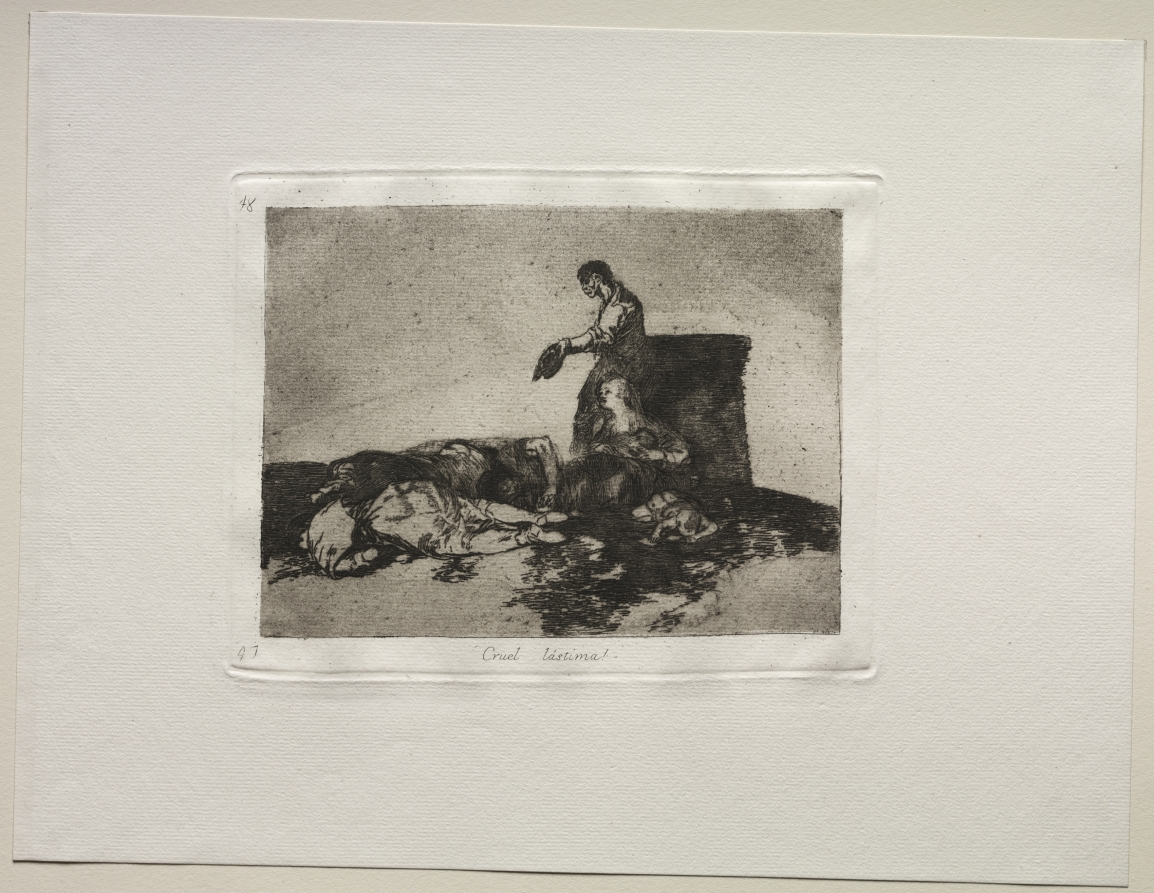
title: The Horrors of War: Cruel Tale of Woe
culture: Spain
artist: Francisco de Goya (Spanish, 1746–1828)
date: c. 1810–20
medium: etching and aquatint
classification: Print